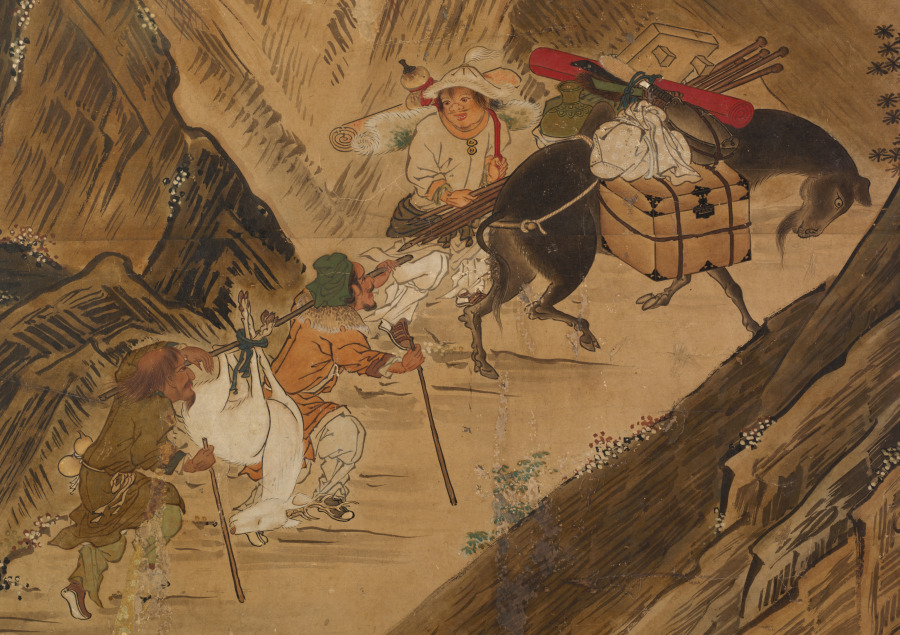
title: Tartars Hunting in a Mountain Landscape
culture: Japan, Edo period (1615–1868)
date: first half of 1600s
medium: six-panel folding screen; ink, color, and gold on paper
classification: Painting